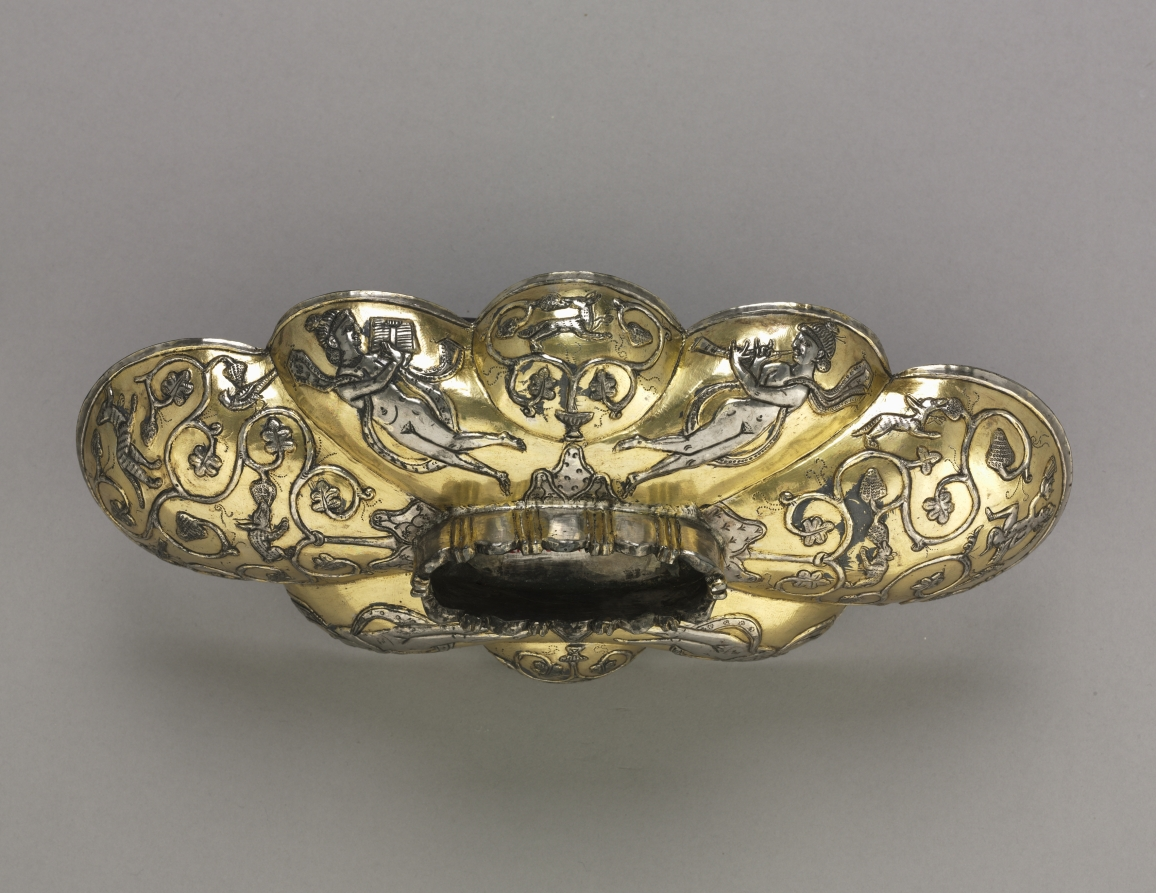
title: Bowl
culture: Iran, Sasanian Empire (224–651 CE)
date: 300–500 CE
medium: silver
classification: Metalwork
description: The decoration on this bowl—a vine with a little nude, accompanied by musicians drinking wine from a rhyton—is related to the Hellenistic cult of Dionysos, or Bacchus, which was brought to Iran by the Greeks and became absorbed into the cult of Anahita.